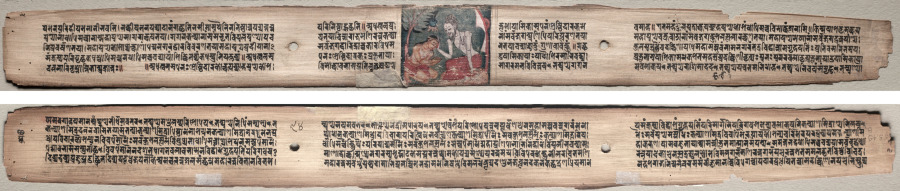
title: Folio 94 from a Gandavyuha-sutra (Scripture of the Supreme Array): Sudhana and the rishi Bhishmottaranirgosha (recto); text (verso)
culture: Nepal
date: 1000–1100s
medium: gum tempera and ink on palm leaf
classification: Painting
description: The subject of the painting on this page accords with the text in another section of the manuscript. It describes the encounter of the pilgrim Sudhana with a Hindu Brahmin sage (rishi) in the forest, who had reached an enlightened state. Many of Sudhana's teachers were not Buddhist monks, but were "true friends" from many walks of life.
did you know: The name of the pilgrim Sudhana means "Good Wealth," and he wears fine clothes and a crown.